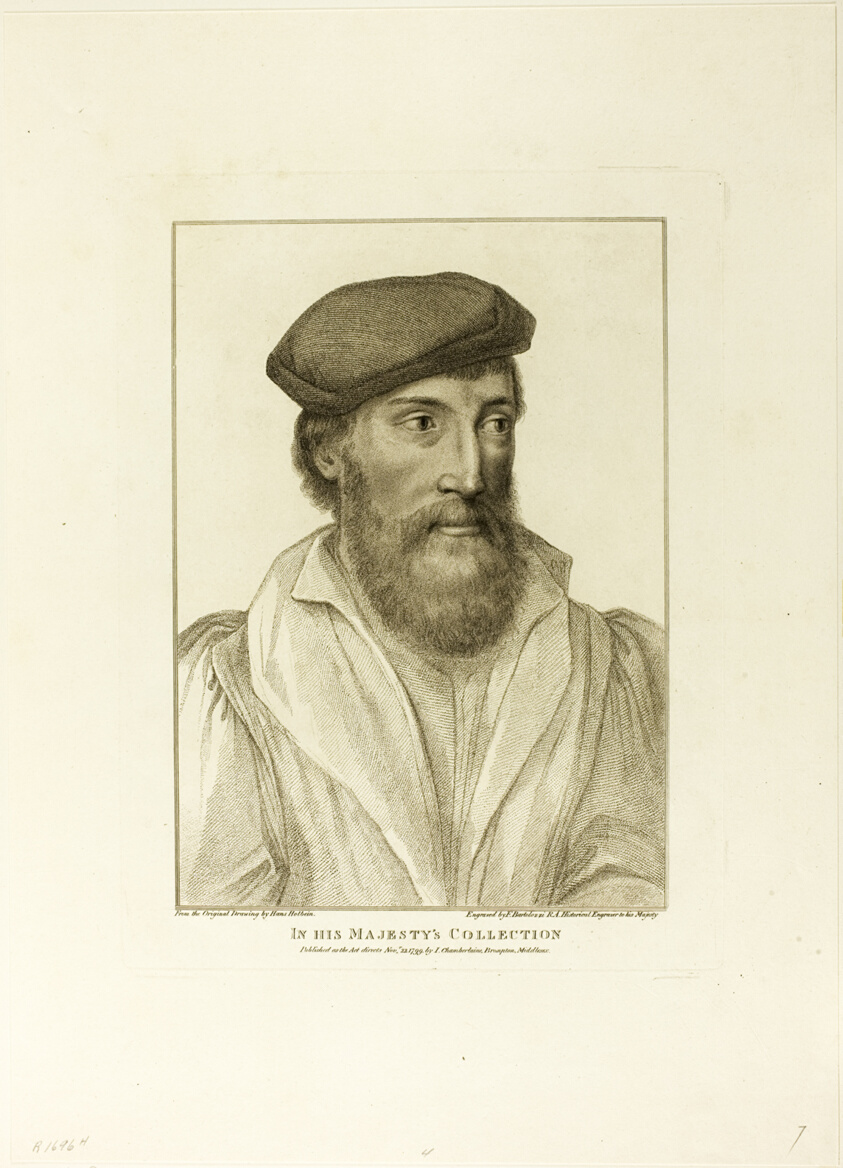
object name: Print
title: Portrait of a Man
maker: Francesco Bartolozzi (Italian, 1727-1815); after Hans Holbein the younger (German, 1497-1543)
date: November 22, 1799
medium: Stipple engraving on ivory wove paper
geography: Italy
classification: engraving; print; prints and drawing